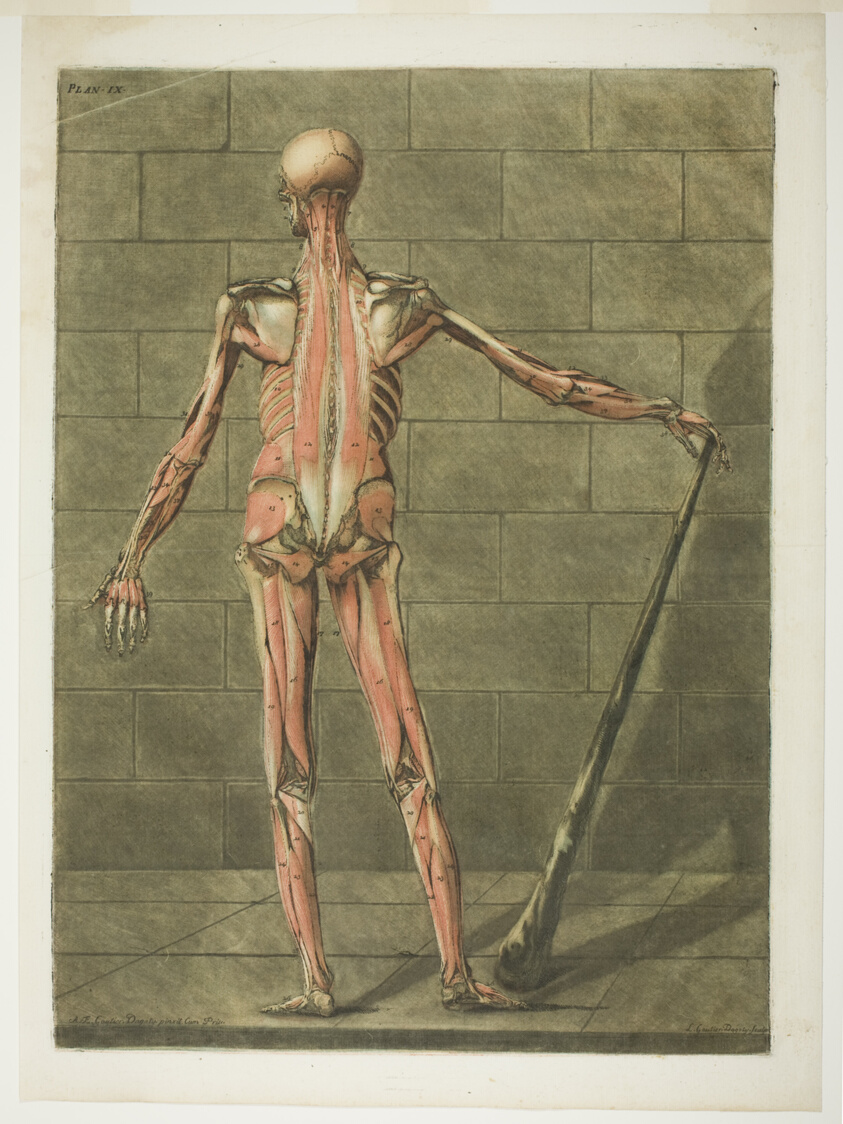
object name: Print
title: Posterior View of Muscle Man, plate nine from Complete Anatomy Course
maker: Arnault Éloi Gautier D’Agoty; French, 1741-1780 or 1783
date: 1773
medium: Color mezzotint, aquatint, and engraving on ivory laid paper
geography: France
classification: mezzotint; print; prints and drawing